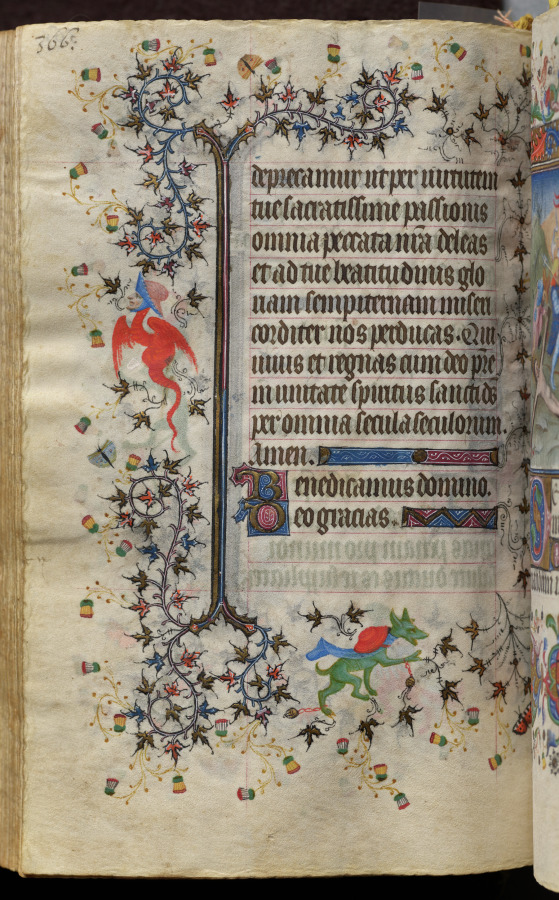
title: Hours of Charles the Noble, King of Navarre (1361-1425): fol. 178v, Text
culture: France, Paris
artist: Master of the Brussels Initials and Associates (French)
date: c. 1405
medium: ink, tempera, and gold on vellum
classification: Bound Volume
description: This precious volume was obviously highly prized by its owner, the French-born King of Navarre, who had his coat of arms painted on no less than twenty folios. Rather than directly commissioning this manuscript from a specific workshop, it seems that Charles the Noble acquired his book of hours -- perhaps ready-made for the luxury market -- while on a trip to Paris in 1404-05. A collaborative effort, six painting styles are evidenced within the pages of this codex, those of two Italians, two Frenchmen, and two Netherlanders. The painter who was responsible for the planning and decoration of the book, and who produced seventeen of the large miniatures, was a Bolognese artist known as the Master of the Brussels Initials. His principal assistant, responsible for most of the borders, was a Florentine who signed his name "Zecho" da Firenze on folio 208 verso.